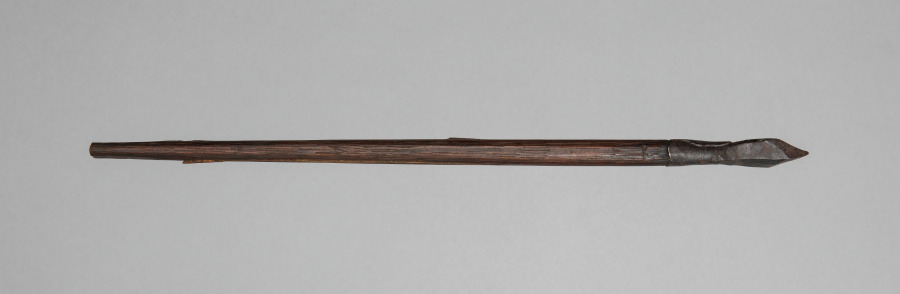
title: Crossbow Bolt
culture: Germany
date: 1500s-1600s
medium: wood, leather, steel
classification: Arms and Armor